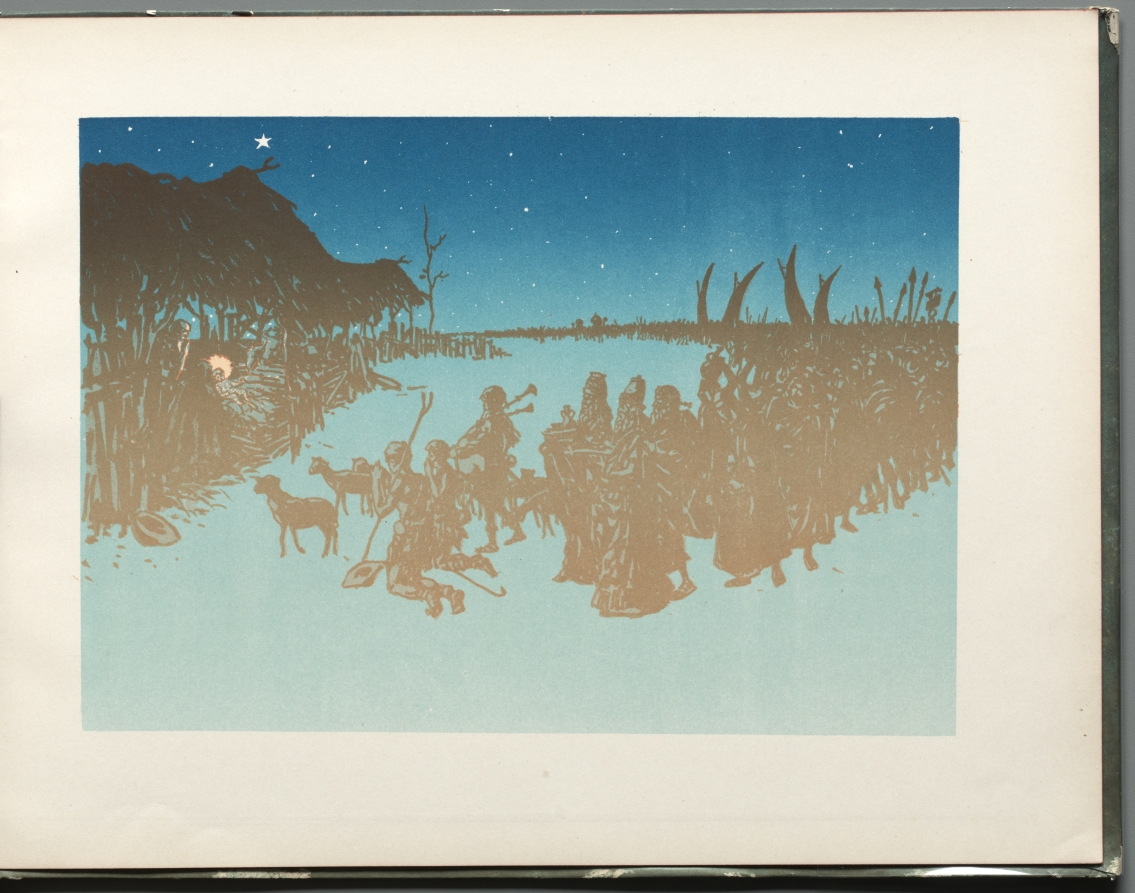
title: The Progress of the Stars: L' Adoration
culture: France, 19th century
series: Bound Volume illustrating the poetry and music of Georges Fragerolle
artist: Henri Rivière (French, 1864–1951)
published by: C. Marpon & Flammarion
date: 1890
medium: 18 color lithographs in a Bound Volume illustrating the poetry and music of Georges Fragerolle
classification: Bound Volume